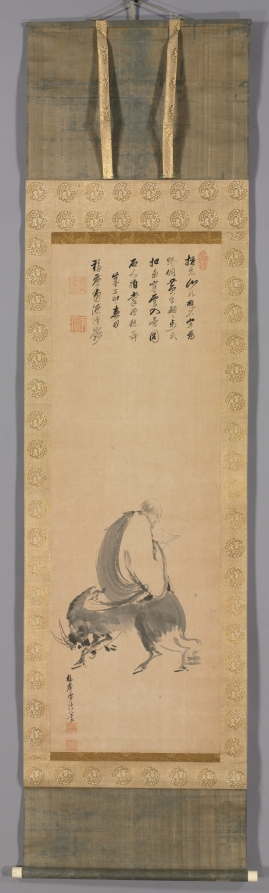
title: Weizheng Riding on an Ox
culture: Japan, Edo period (1615–1868)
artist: Yamaguchi Sekkei (Japanese, 1644–1732)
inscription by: Nanyuan Xingpai (Chinese, 1631–1692)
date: 1687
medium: hanging scroll; ink on paper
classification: Painting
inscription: 関房印 正法（灋）眼/抗志山林邂名宰蒋/ 跨個黃牛翩翩步武/ 扣角穿雲入聖圖/ 石人拍掌須彌舞/ 筆丁卯春日/ 福唐南源 謹題/ 印（上）性派之印/ 印（下）南源/ 款記 梅庵雪渓筆/ 落款印（上）梅庵（下）雪渓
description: The inscription at the top of this painting was brushed by Ōbaku school monk Nanyuan Xingpai (Japanese: Nangen Shōha), a Chinese Buddhist monk who emigrated to Japan in 1654, while the painting was done in ink by Yamaguchi Sekkei, a Japanese painter active in Kyoto who was known for his Buddhist subjects, many of which remain in temples today. The figure here reads a text while riding backward upon a water buffalo. Sekkei's painting depicts the Chinese monk Weizheng (986–1049), also known as "Zheng of the Yellow Ox" after his favored mount. Nanyuan's inscription is a poem about the monk.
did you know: The Ōbaku lineage of the Zen school of Buddhism in Japan is named for Mount Huangbo (Japanese: Ōbaku) in China.